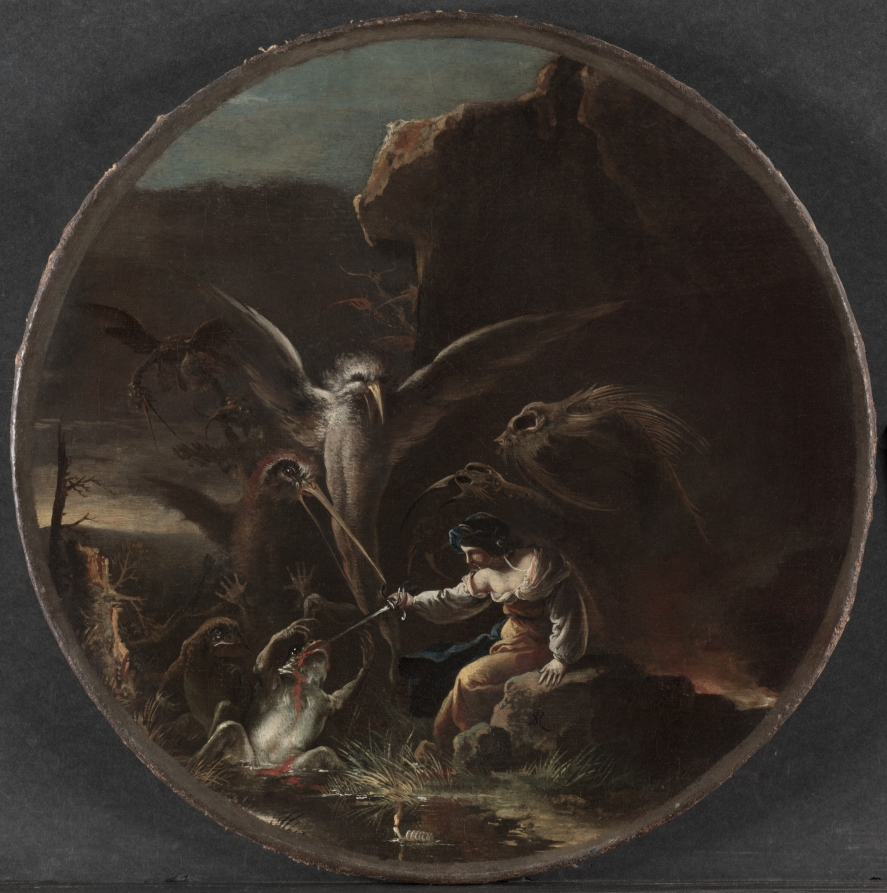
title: Scenes of Witchcraft: Morning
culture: Italy, 17th century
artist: Salvator Rosa (Italian, 1615–1673)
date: c. 1645–1649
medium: oil on canvas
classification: Painting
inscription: Signed: "SR [monogram]"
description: Rosa's first scene depicts a young witch who plunges her knife into a writhing amphibian at dawn. The dark clouds of daybreak and anthropomorphic crags provide a gloomy atmosphere, while malevolent birds with piercing beaks hover around the central stabbing, focusing the viewer's attention on the witch's vicious act. The only beautiful enchantress Rosa ever painted, her elegance and ability to transform men into animals evokes the goddess Circe. But Rosa wasn't interested in classical imagery; he inverted expectations by transforming Circe into an explicitly violent sorceress. Her calm expression makes the terrifying gesture of upraised human hands among the birds even more disturbing.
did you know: The artist chose the painting's shape to reference the foundational role of the circle in practicing magic.